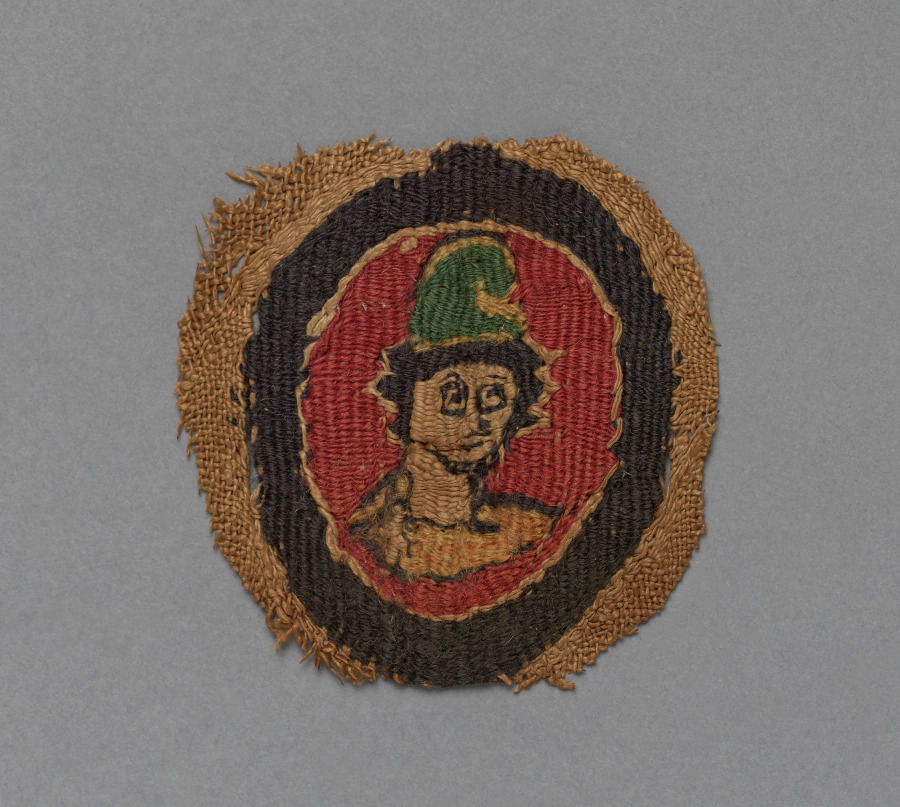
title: Fragment from a Tunic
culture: Egypt, 6th - 16th century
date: 500s - 1500s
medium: tabby weave with inwoven tapestry ornament, linen and wool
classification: Textile